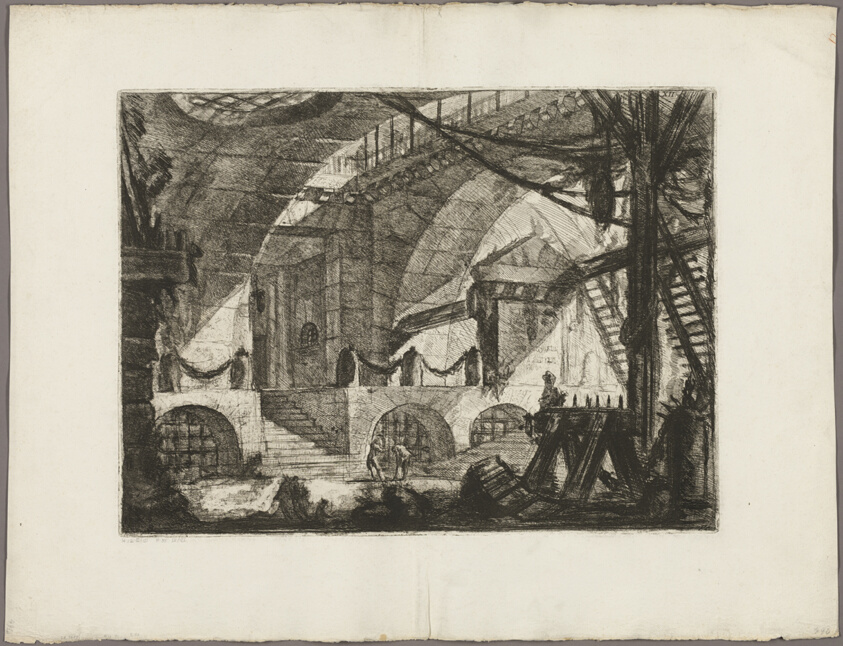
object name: Print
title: The Sawhorse, plate 12 from Imaginary Prisons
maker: Giovanni Battista Piranesi (Italian, 1720-1778)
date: 1761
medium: Etching and engraving on heavy ivory laid paper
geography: Italy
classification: etching; print; prints and drawing